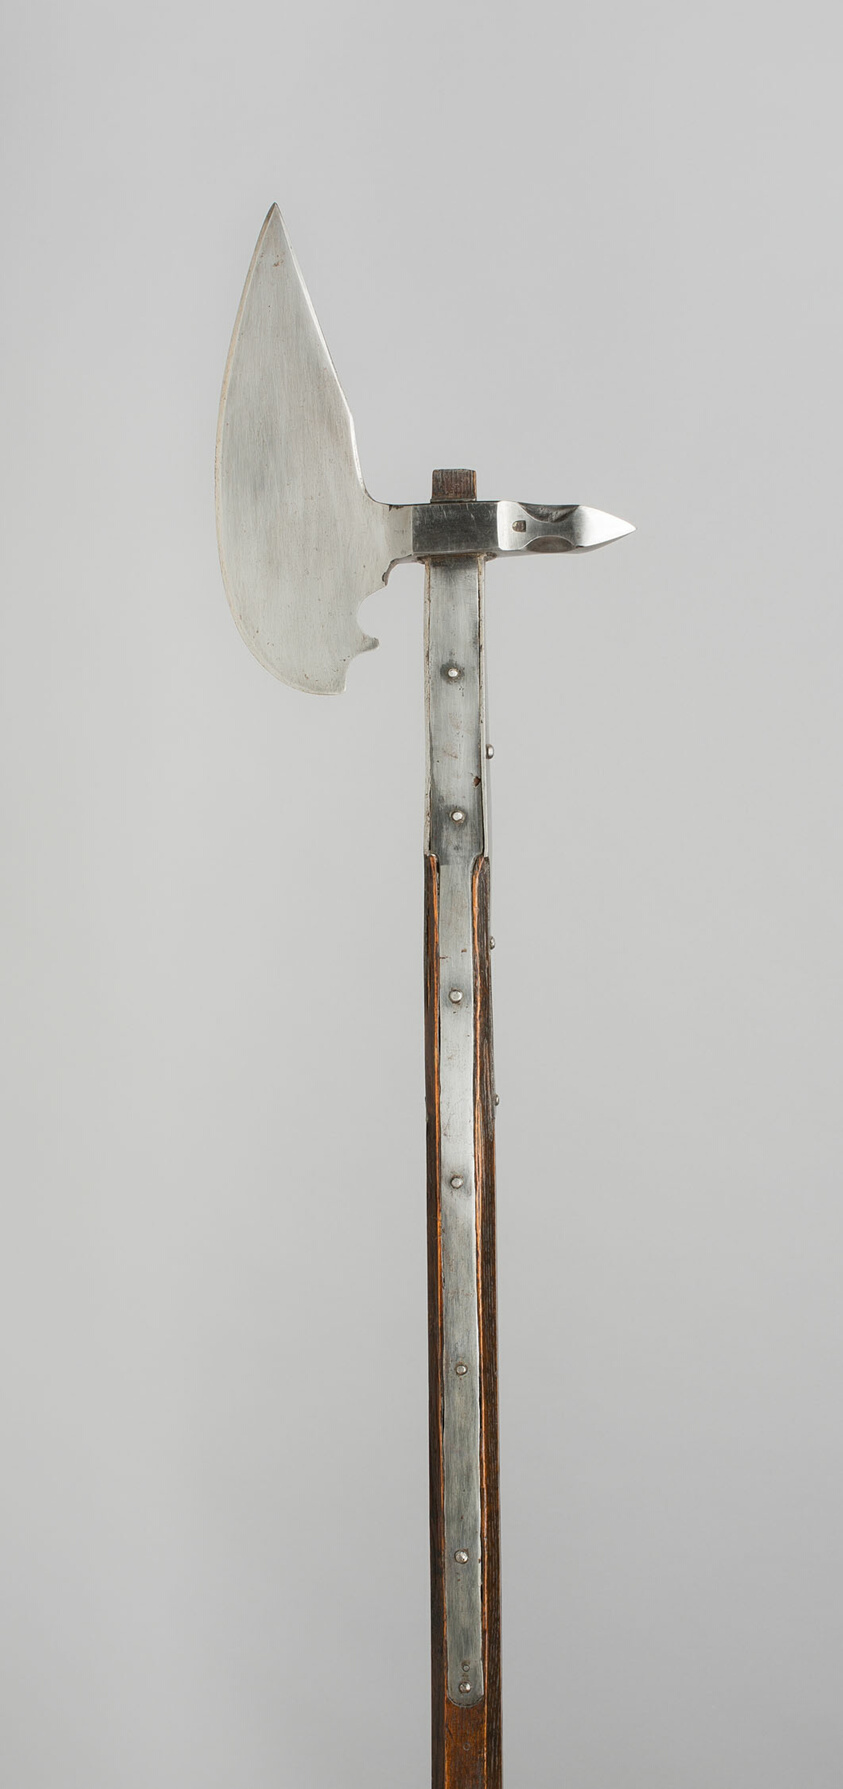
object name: Arms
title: Mordaxt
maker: Swiss, probably Zurich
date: 1600-30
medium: Steel and wood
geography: Switzerland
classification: edged weapon-staff; arms; arms and armor